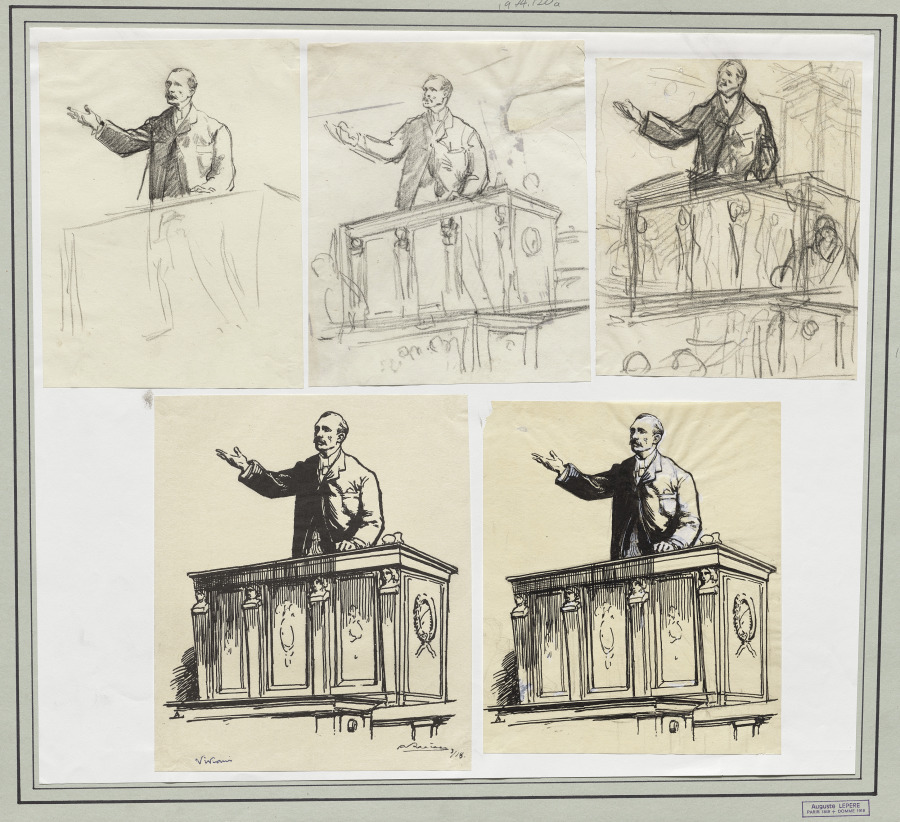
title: Viviani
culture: France, 20th century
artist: Auguste Louis Lepère (French, 1849–1918)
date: 1914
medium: black crayon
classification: Drawing